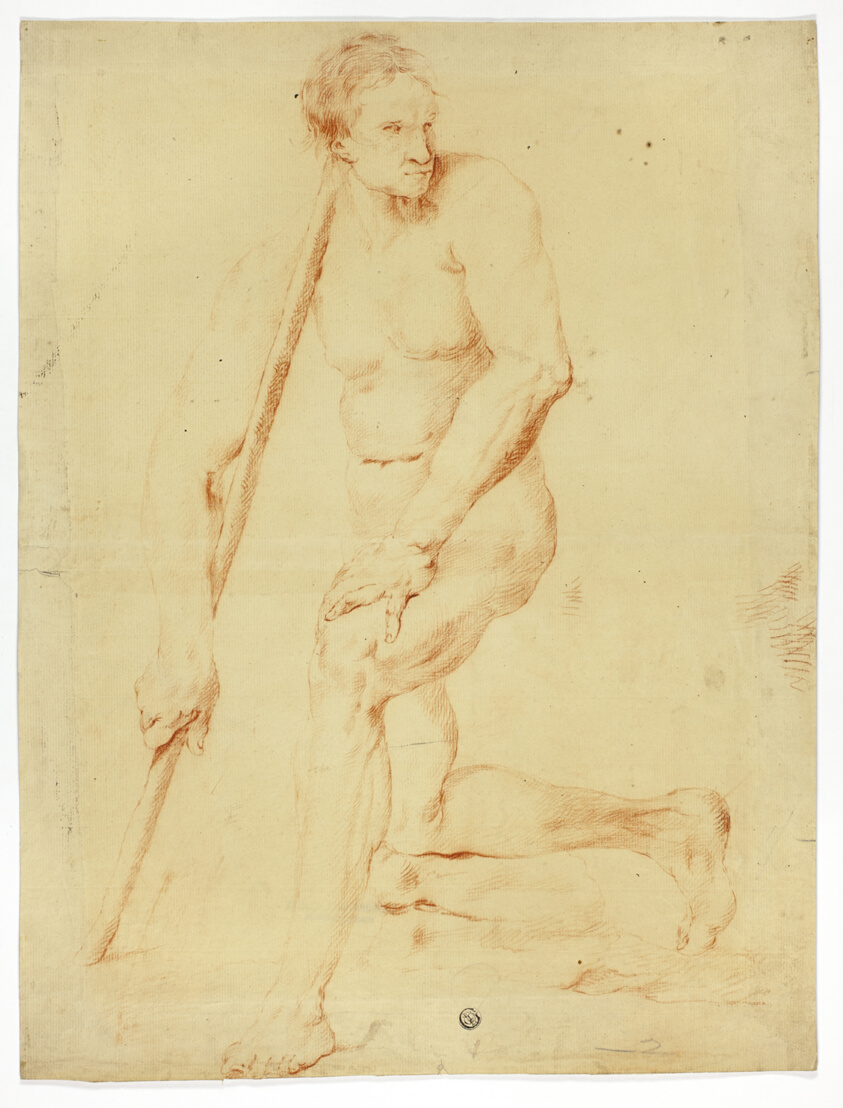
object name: Drawing and Watercolor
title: Academic Male Nude Leaning on Staff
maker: Style of Pompeo Girolamo Batoni (Italian, 1708-1787)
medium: Red chalk, with stumping, on cream laid paper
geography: Italy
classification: chalk; drawings (visual works); prints and drawing